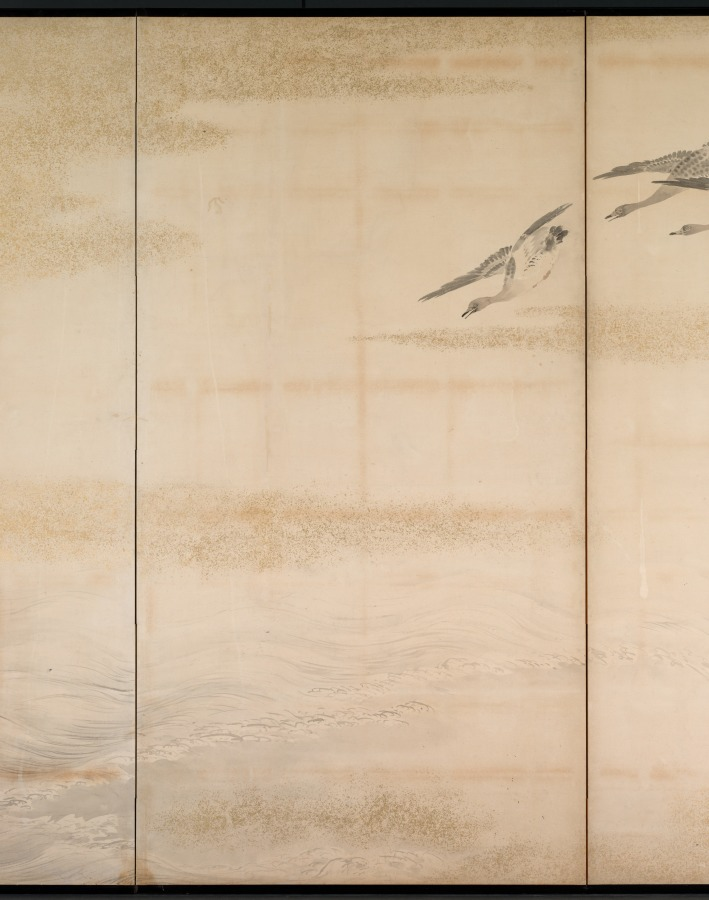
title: Geese, Reeds and Water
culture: Japan, Edo period (1615–1868)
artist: Yamamoto Baiitsu (Japanese, 1783–1856)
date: 1800s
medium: One of a pair of four-panel folding screens; ink, color, and cut gold foil on paper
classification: Painting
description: This byōbu composition differs from most in that it comprises two four-panel screens, rather than two six-panel units. Since the current mounting is modern, it is impossible to determine whether its present configuration represents its original design. Some panels may have been removed to help the screens better fit into a modern interior space. Baiitsu worked almost exclusively in monochromatic ink tones and favored classical Chinese painting themes.